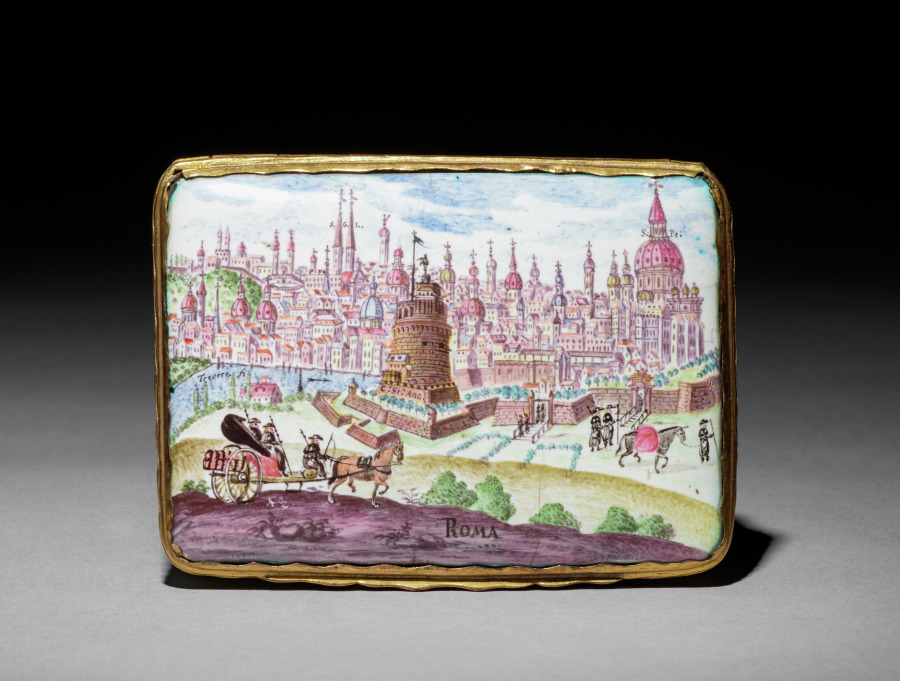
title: Snuff Box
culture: Austria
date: c. 1750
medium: enamel on copper with metal mounts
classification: Miscellaneous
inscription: on top there are a number of inscriptions in black: "Roma," "Trevere R," "C:ST: Ang" (for Castello San Angelo), "S: Pe:" (for San Pietro), "S.G.L." (probably for San Giovanni Laterano). on interior of lid: "WIENNE."